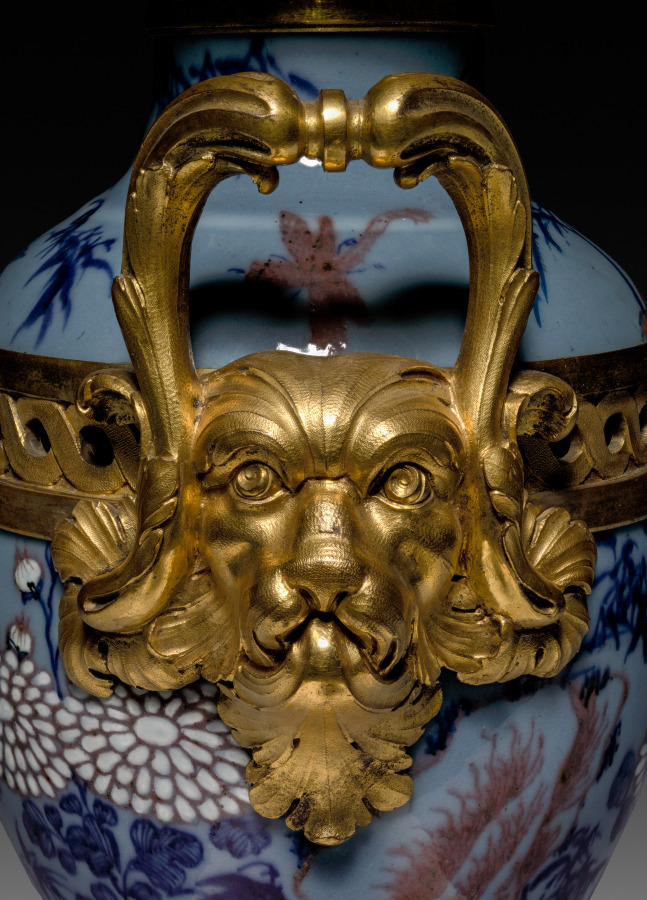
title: Garniture Set (one clock and 2 vases)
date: 1736–1770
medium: Chinese hard-paste porcelain, gilt bronze, enameled metal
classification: Furniture and woodwork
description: The fascination with Chinese porcelain among aristocratic circles increased during the reign of Louis XV. In reaction to the perceived excesses of elaborate naturalistic ornament of the 1750s, mount makers increasingly turned to neoclassical designs, known as Goût Grec (Greek taste) in the 1760s and 1770s. These beautifully chased gilt-bronze mounts feature classical Greco-Roman motifs such as lion masks, acanthus and laurel leaves, and pilasters.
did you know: A set of vases and clock, connected visually by the use of the same materials, often adorned a mantlepiece or the top of a large piece of furniture, such as a commode or console, within a room.